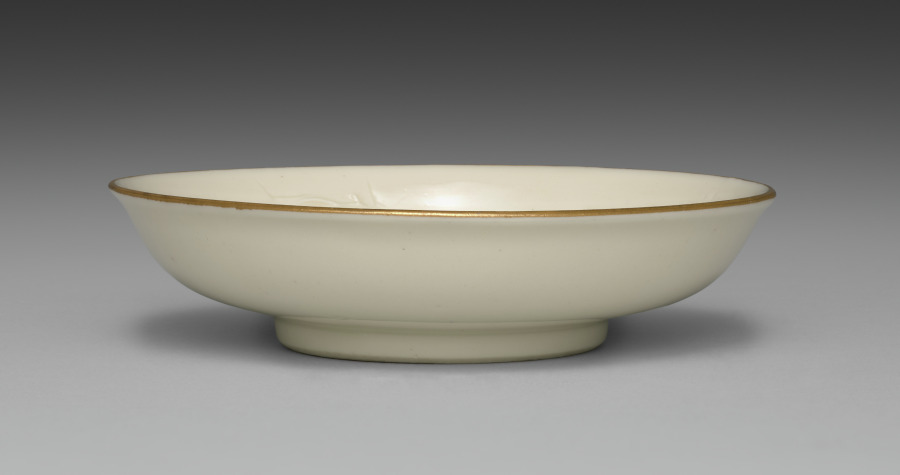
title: Small Dish from Dining Set with Plum Blossoms and Cracked-Ice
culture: Japan, Meiji period (1868–1912)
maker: Seifū Yohei II (Japanese, 1844–1878)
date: c. 1875–78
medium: Porcelain with molded designs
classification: Ceramic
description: Each item in this set has a delicate low-relief design of flowering plum branches over scattered, intersecting lines meant to resemble the cracked-ice surface of a frozen body of water and is signed on the base in gold pigment. While Yohei II produced many fine works in underglaze blue, like those produced by Kiyomizu Shichibei, he also made works in quite different styles later in his career, from the early 1870 s. In 1873, he was appointed purveyor to the Industrial Center of Kyoto Prefecture, a designation associated with Kyoto’s efforts to reach an international market through the port of Kobe; and from 1875 until his death, he was involved in national-level projects to present Japanese ceramics across the world. It was during this period that Yohei III was apprenticed to Yohei II, and it has been suggested that this set may in fact be an early example of Yohei III’s work, which he signed with his teacher’s name. Decorated with flowers resembling Japanese textile motifs, the set calls to mind the design of Yohei II’s pair of vases with plum blossoms in the Victoria and Albert Museum. Here, the elaborate trees created for a formal public exhibition setting have been translated into the approachable blossoms of the genteel domestic environment. While the designs are consistent across the pieces, each raised flower petal and pistil and each incised line in the ice was done by hand, so the cups, bowls, and dishes are similar yet unique. The bottoms of two boxes once identified the set’s owner, but the information has been deliberately obscured with black ink. However, inscriptions still visible appear to indicate two occasions, once at the end of July 1886 , and once again in June 1916 , when parts of the set were requested from Hokura in Niigata Prefecture. The location corresponds to a neighborhood in the present-day city of Jōetsu. The surname Tsuji 辻 also appears on a paper tag affixed to one of the box cloths. Future research may possibly reveal more about their provenance. A vase by Yohei III in a private collection combines the formal grandeur of the Yohei II vases in the Victoria and Albert Museum with the gentler design of this dining set, placing flowering plum trees against soft, scalloped-edge clouds resembling those in golden screens.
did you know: The dining wares have a creamy white coloration that the four boxes containing them identify as Korean in style.